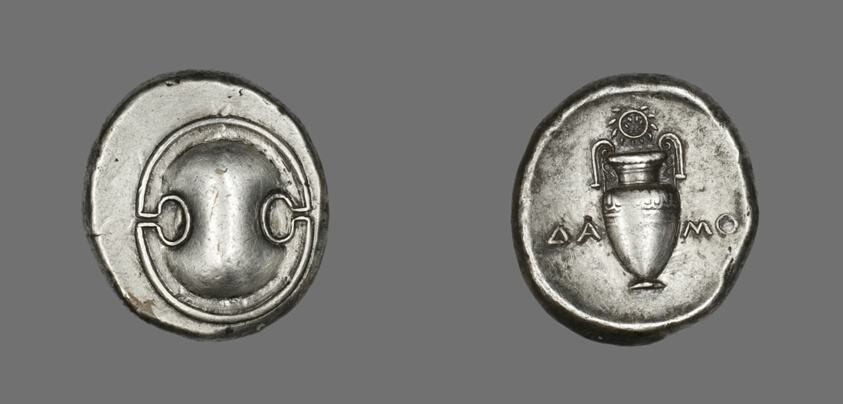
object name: Coin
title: Stater (Coin) Depicting a Shield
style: late classical, greek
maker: Greek; minted in Thebes, Boeotia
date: 379-338 BCE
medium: Silver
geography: Thívai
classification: coin; ancient art